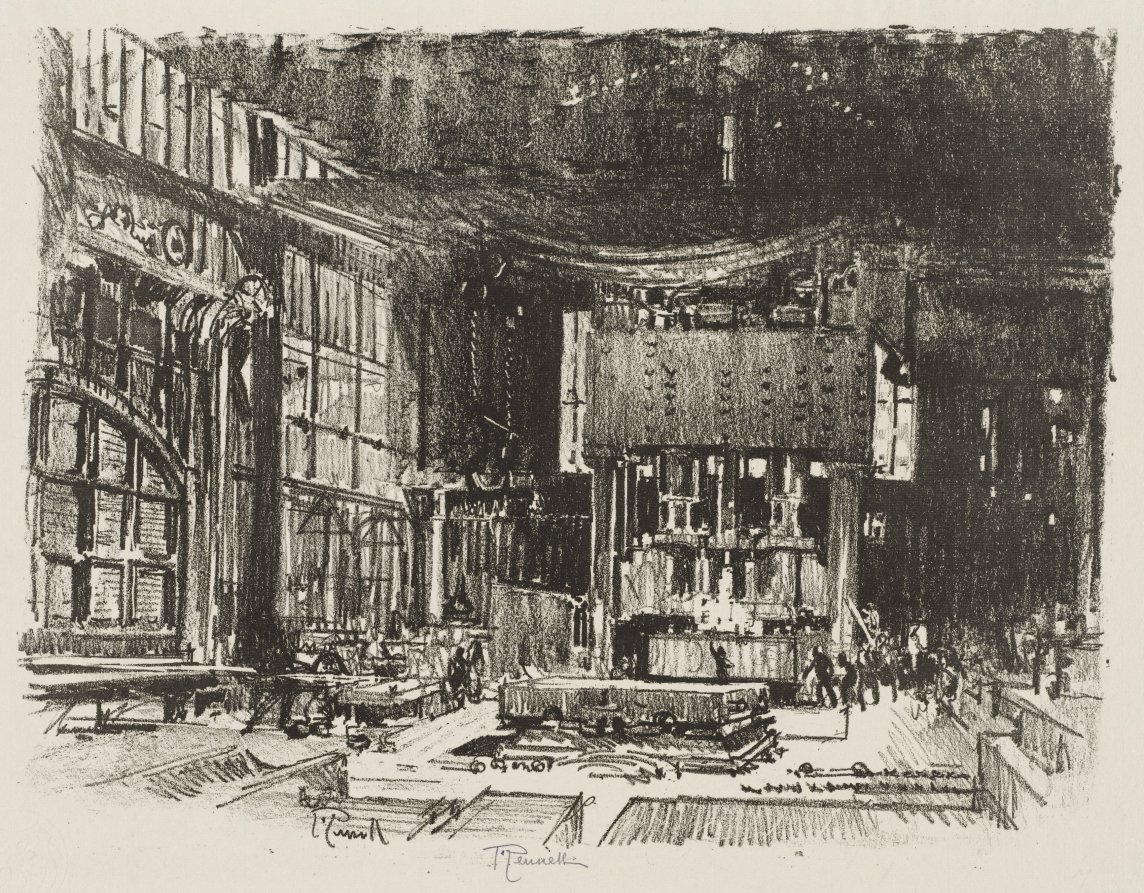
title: English War Work: The Acolytes Preparing the Altar of the War God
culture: America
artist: Joseph Pennell (American, 1857–1926)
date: 1916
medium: lithograph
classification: Print